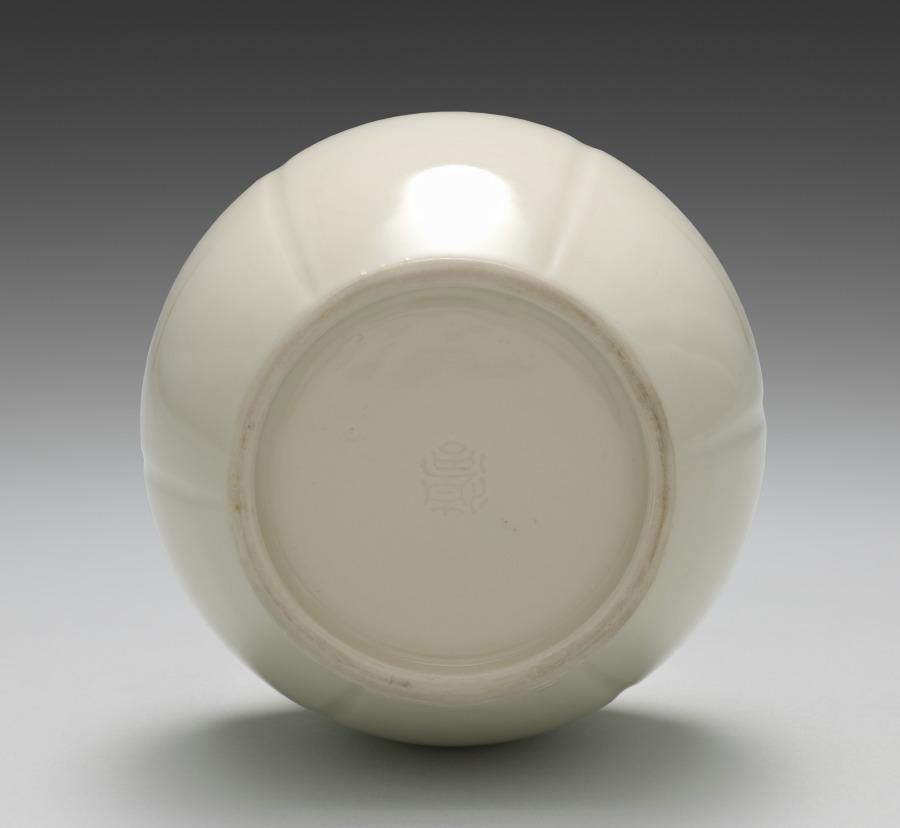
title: Container from Lit Charcoal and Ash Containers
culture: Japan, Meiji period (1868–1912)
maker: Seifū Yohei III (Japanese, 1851–1914)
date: 1893–1914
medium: One from a set of four containers; porcelain with molded design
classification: Ceramic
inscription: 清風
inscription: The storage box for this set is inscribed and impressed with seals.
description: The box lid for these six-lobed lit charcoal and ash containers, or hiire, identifies them as kōhakuji, another of Yohei III’s translucent cream colors over ivory clay bodies. One might translate the name as “lustrous pearl[–glazed ivory] porcelain.” A hiire was filled with ash with burnt coals at the center so that embers and tobacco ash could be discarded safely during a gathering. Each of the lobes on the containers has a round protrusion set below the rim. The studlike pattern is called ruiza. The term is also used to describe the pattern that rings the shoulder of some flower vases or metal kettles used in chanoyu.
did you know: The Seifu studio generally followed the standard practice in Japan for identifying the artist and object in box inscriptions.